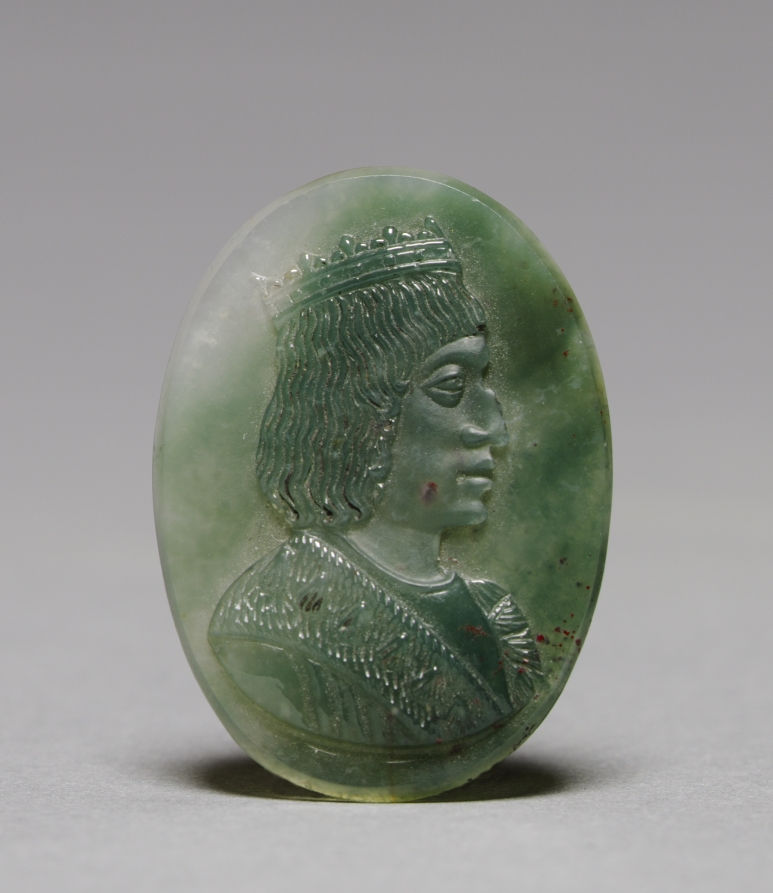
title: Cameo of King Charles VIII of France (1470–1498)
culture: France, Lyon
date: c. 1494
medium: agate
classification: Glyptic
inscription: "C 8 RF" (possibly a later inscription).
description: This jade-green agate cameo represents King Charles VIII in bust profile wearing the royal crown and the collar of the Order of St. Michael. The cameo was probably inspired by a gold medal presented to Charles by the City of Lyon during a visit in 1494 and was probably made to commemorate the event. It was perhaps a memento belonging to one of the town's nobles.